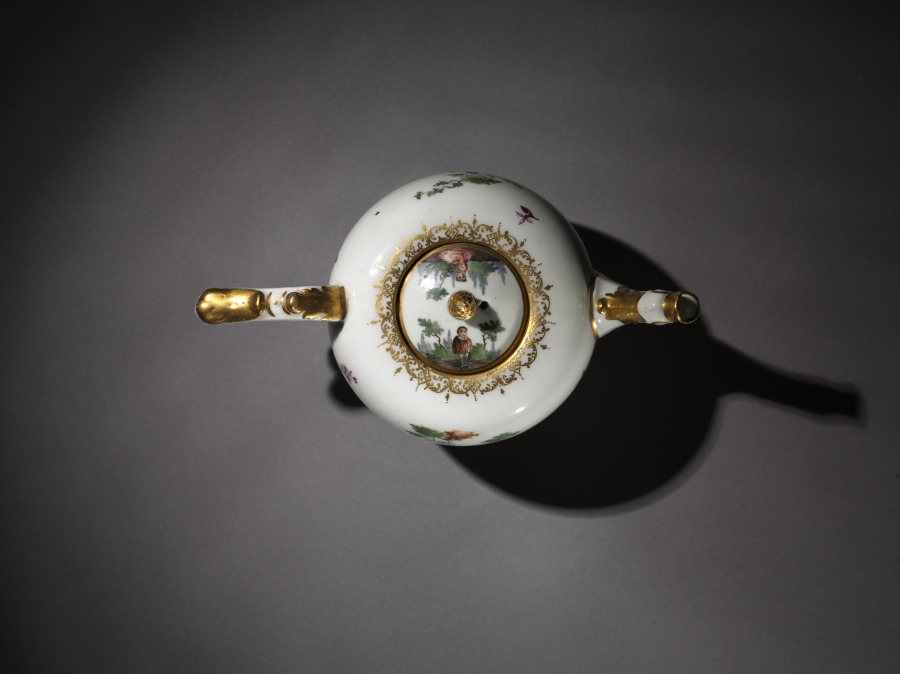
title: Teapot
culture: Germany, Meissen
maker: Meissen Porcelain Factory (German, est. c. 1710)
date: c. 1750–70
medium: porcelain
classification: Ceramic